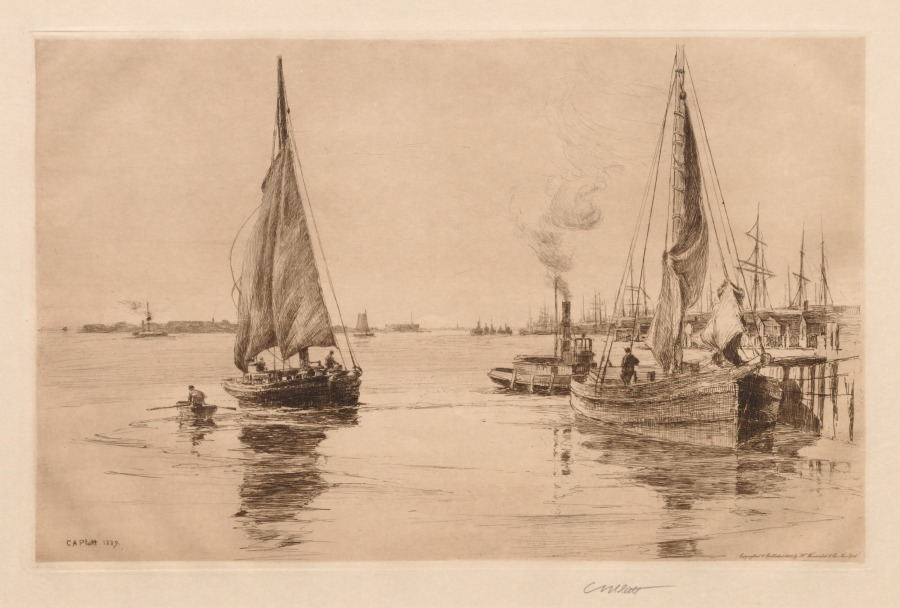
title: Two Sloops on the East River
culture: America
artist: Charles Adams Platt (American, 1861–1933)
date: 1889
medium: etching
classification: Print